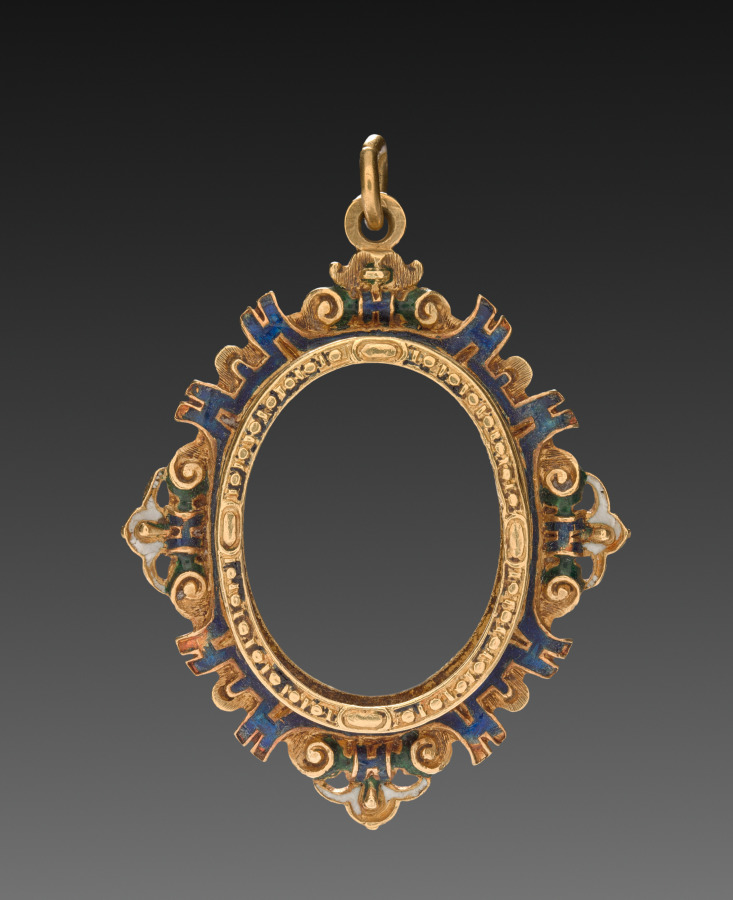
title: Pendant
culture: Germany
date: 1500s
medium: gold and enamel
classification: Jewelry